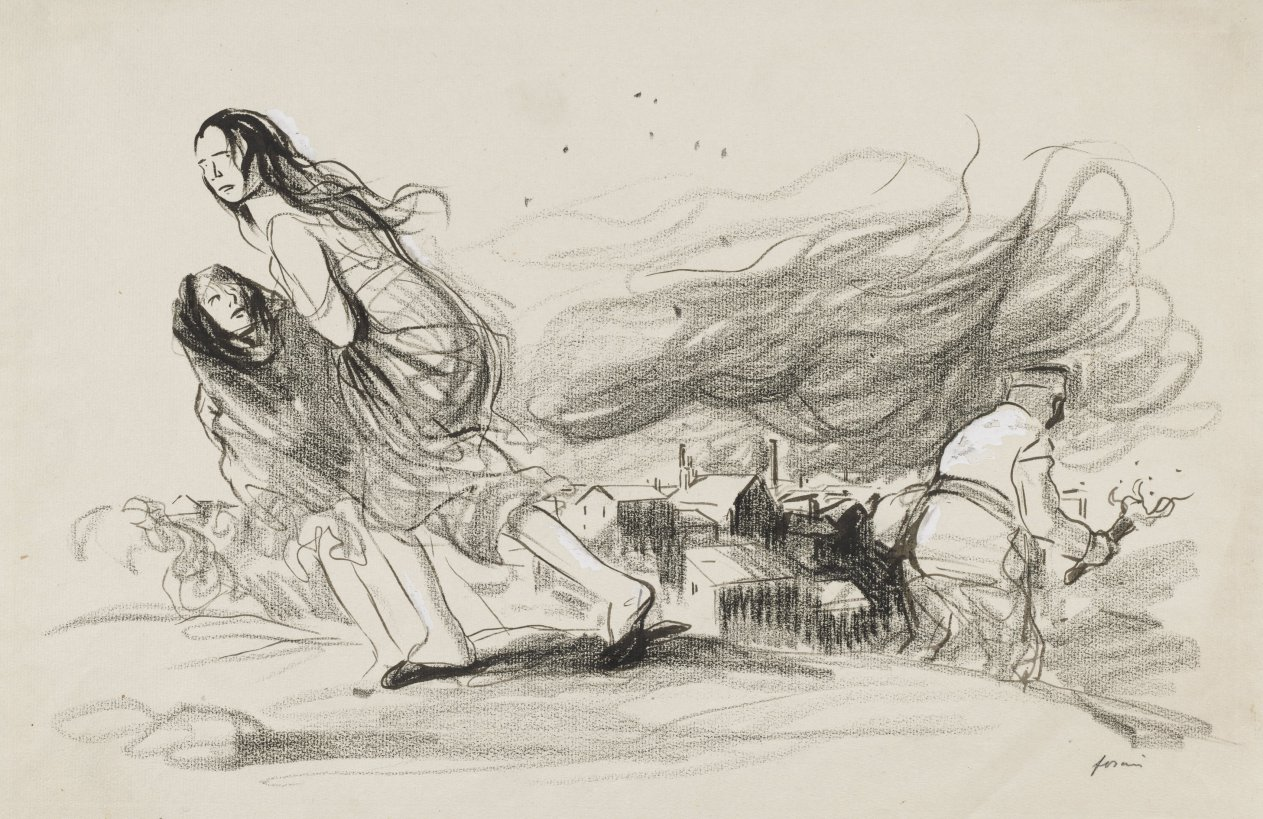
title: "They Are Burning Everything - They must be about to Retreat"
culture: France, 20th century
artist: Jean Louis Forain (French, 1852–1931)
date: c. 1919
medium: black crayon and black wash heightened with white gouache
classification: Drawing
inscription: signed, lower right, in graphite: forain ; across bottom, in graphite: Apres Douai ("Les troupes allemandes ont reçu l'ordre le plus formel d'épargner la [propreté?] [illegible]" [G?]olf.. "Sans doute, l'ordre métait pas encore arrivé." ; lower right, in graphite: A2362